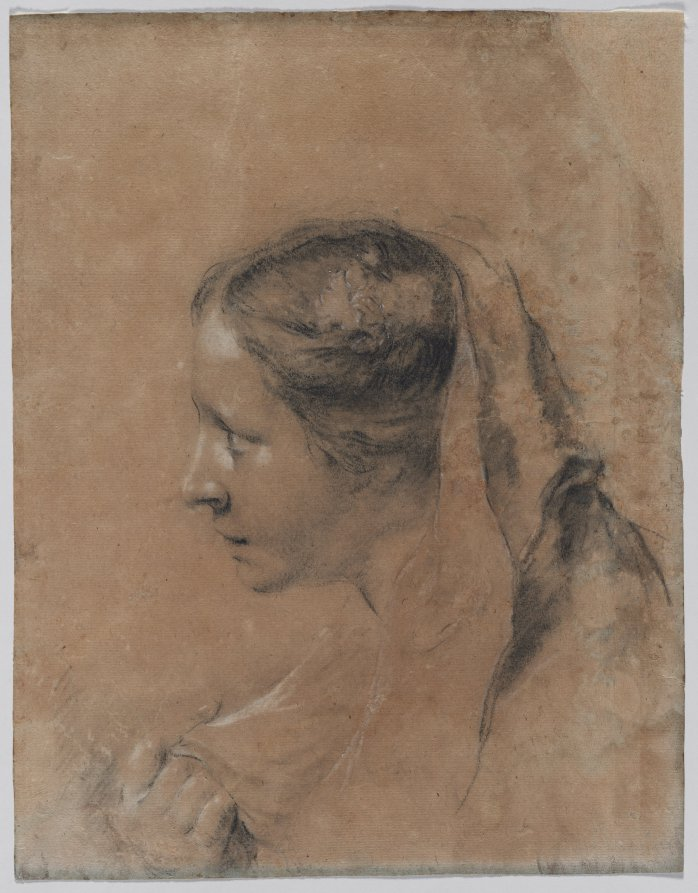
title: Head of a Woman in Profile with a Scarf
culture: Italy, Venice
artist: Giovanni Battista Piazzetta (Italian, 1682–1754)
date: c. 1720–31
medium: black chalk, stumped, heightened with white chalk and gypsum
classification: Drawing